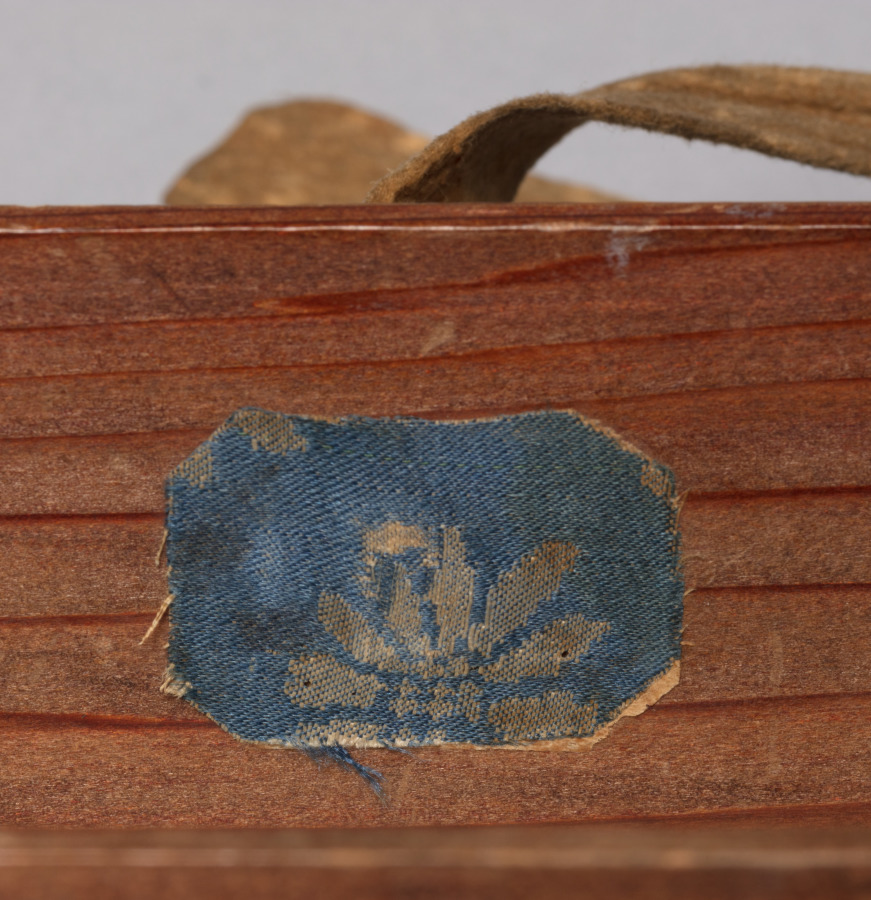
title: Calligraphy with Willow and Swallows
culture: Japan, Muromachi period (1392–1573)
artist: Ikkyū Sōjun (Japanese, 1394–1481)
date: 1400s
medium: hanging scroll, ink on paper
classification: Painting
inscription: How many days has it rid itself of the crow’s cloth? It knows not!/ Lovely is its body so nimble and neat./ Neither men of wealth, courtly position, or power can come close to the unfettered, noble swallow!/ With the coming of spring, it seems to be flying about, dancing around the grass hut of the foolish Priest. signed: Unkasō Isshi Tōkai jun Ikkyū shi ga ippitsu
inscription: outer box inscribed: Ikkyū Ōshō Enshi-zu Jigasan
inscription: inner box side lid inscribed: Showa 50 (1975), November by Tayama Honan with kao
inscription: Inner box side lid inscribed: Ikkyū Ōshō Bokuseki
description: The famed Buddhist monk Ikkyū is best remembered for his calligraphy. Calligraphic conventions of his time called for brushwork that did not vary much in style from character to character. However, as Ikkyū’s lines progress, his brushwork wanders between standard script and a sort of shorthand, marked by an uneven distribution of ink and a reduction of the characters to only the most necessary strokes. Ikkyū’s direct communication of emotion via brushwork became characteristic of the works produced by monks affiliated with the temple Daitokuji later in the Edo period (1615–1868).